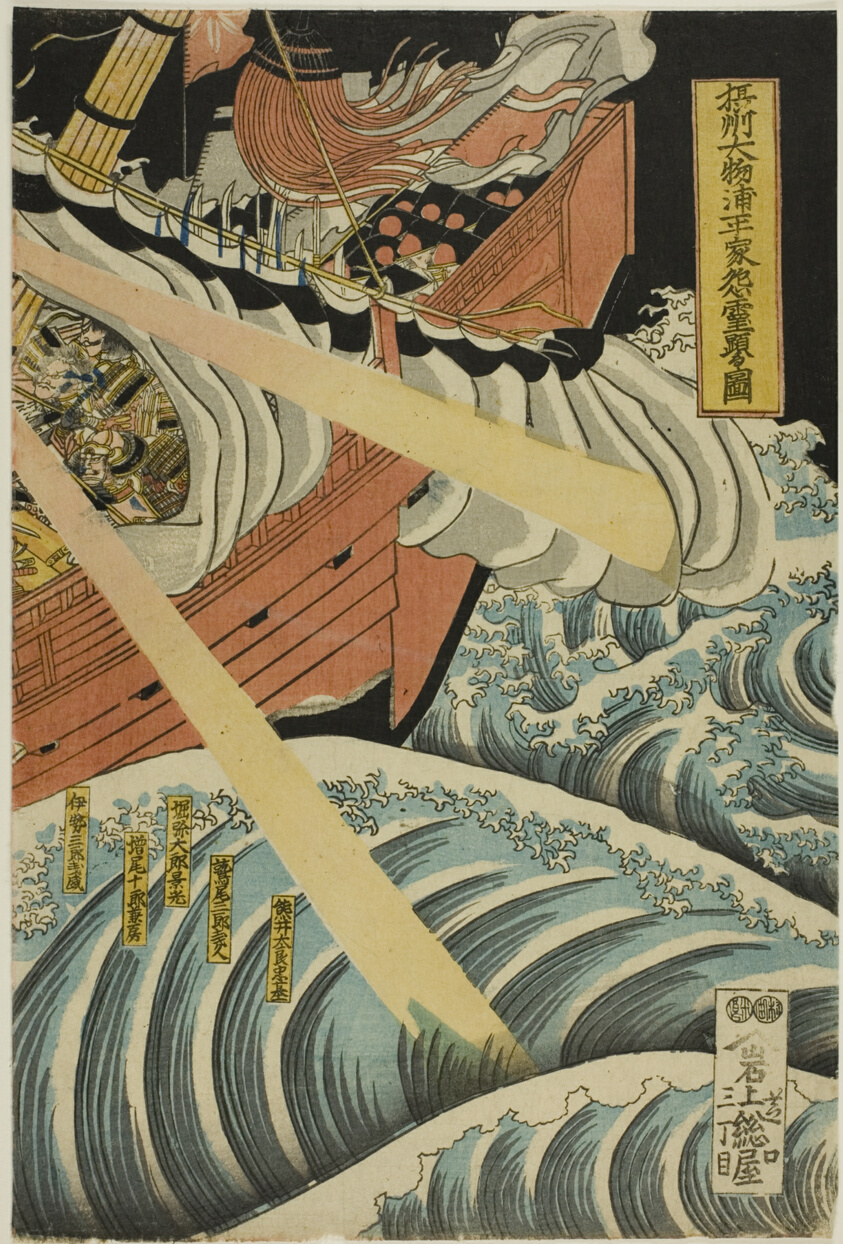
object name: Print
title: The Ghosts of the Heike Appear in Daimotsu Bay in Settsu Province (Sesshu Daimotsu no ura Heike onryo arawaruru zu)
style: Japanese (culture or style)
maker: Katsushika Hokui (Fukao Hokui); Japanese, active c. 1830-40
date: 1847/52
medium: Color woodblock print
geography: Japan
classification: woodblock print; print